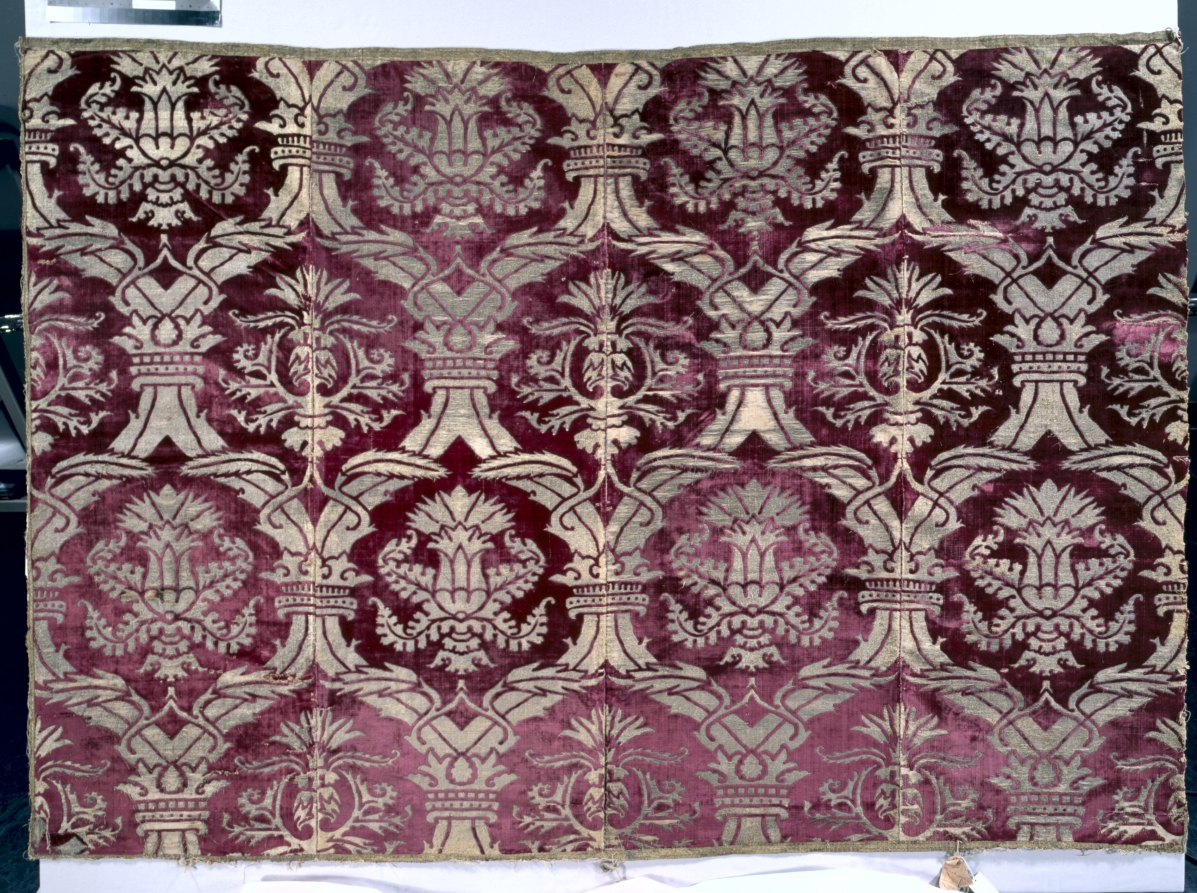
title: Brocaded Velvet Panel with Italianate Pattern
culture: Turkey, Istanbul or Bursa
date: 1575–1625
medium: Silk: velvet, brocaded; gilt-metal thread and cotton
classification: Velvet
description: Rarely are four fabric widths preserved together from any culture. This gilt-metal thread pattern combines Turkish and Italian features: the large ogival (curved) lattice clasped by crowns and the velvet structure are Turkish, and the two so-called artichoke designs are enlarged adaptations of Italian motifs. A symbol of wealth and power, this velvet panel was woven during the artistic height of the Ottoman Empire in the late 1500s. It may have covered a divan (sofa) or possibly enhanced a wall during cold winters in the imperial Topkapi Palace in Istanbul.